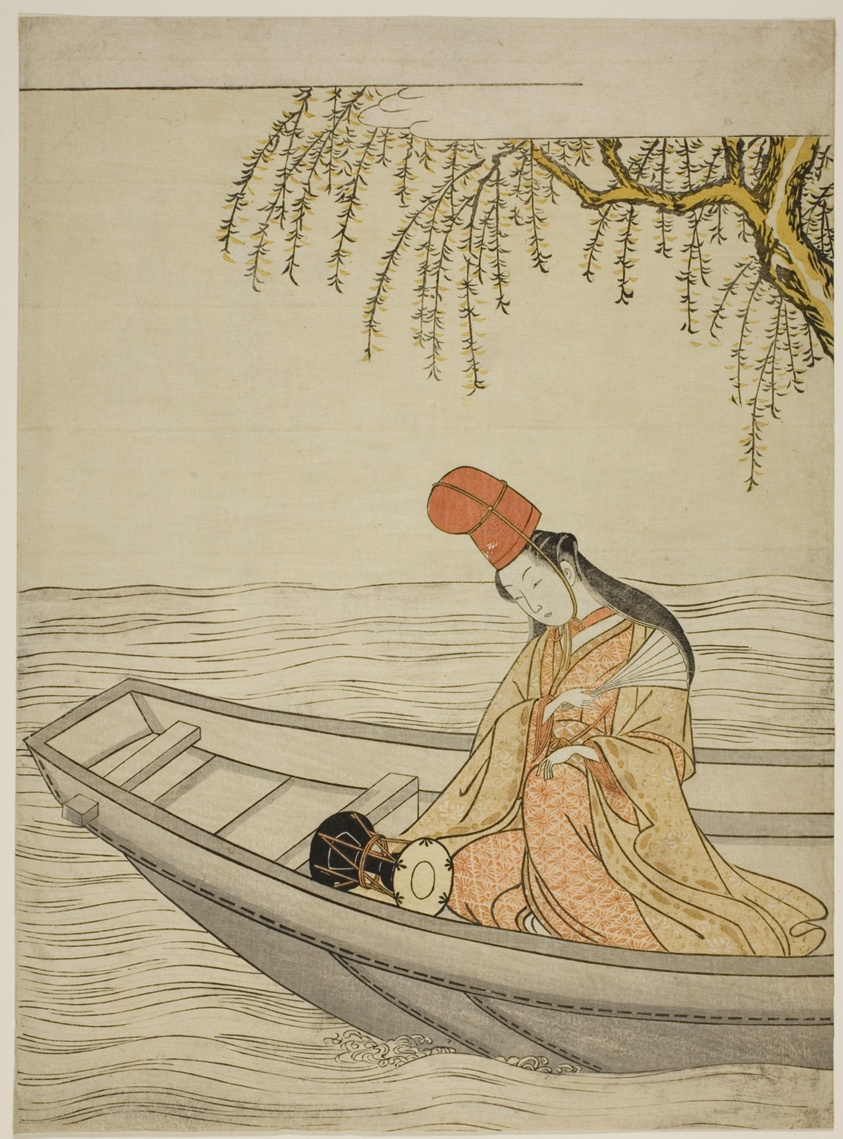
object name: Print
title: Shirabyoshi Dancer in Asazuma boat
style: Japanese (culture or style)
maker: Suzuki Harunobu 鈴木 春信; Japanese, 1725 (?)-1770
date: c. 1766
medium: Color woodblock print; chuban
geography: Japan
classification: woodblock print; print; asian art